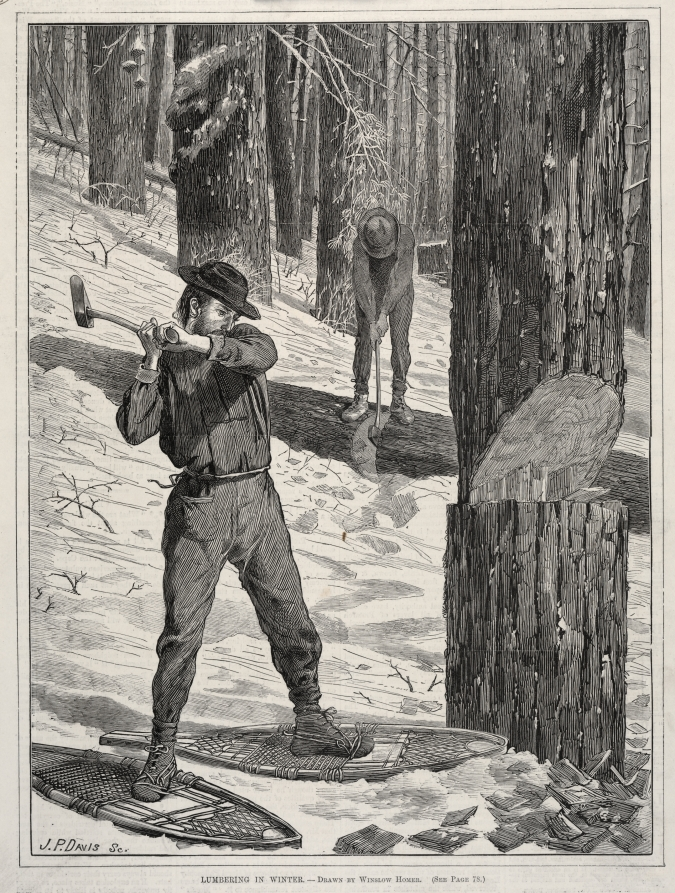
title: Lumbering in Winter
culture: America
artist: Winslow Homer (American, 1836–1910)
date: 1871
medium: wood engraving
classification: Print